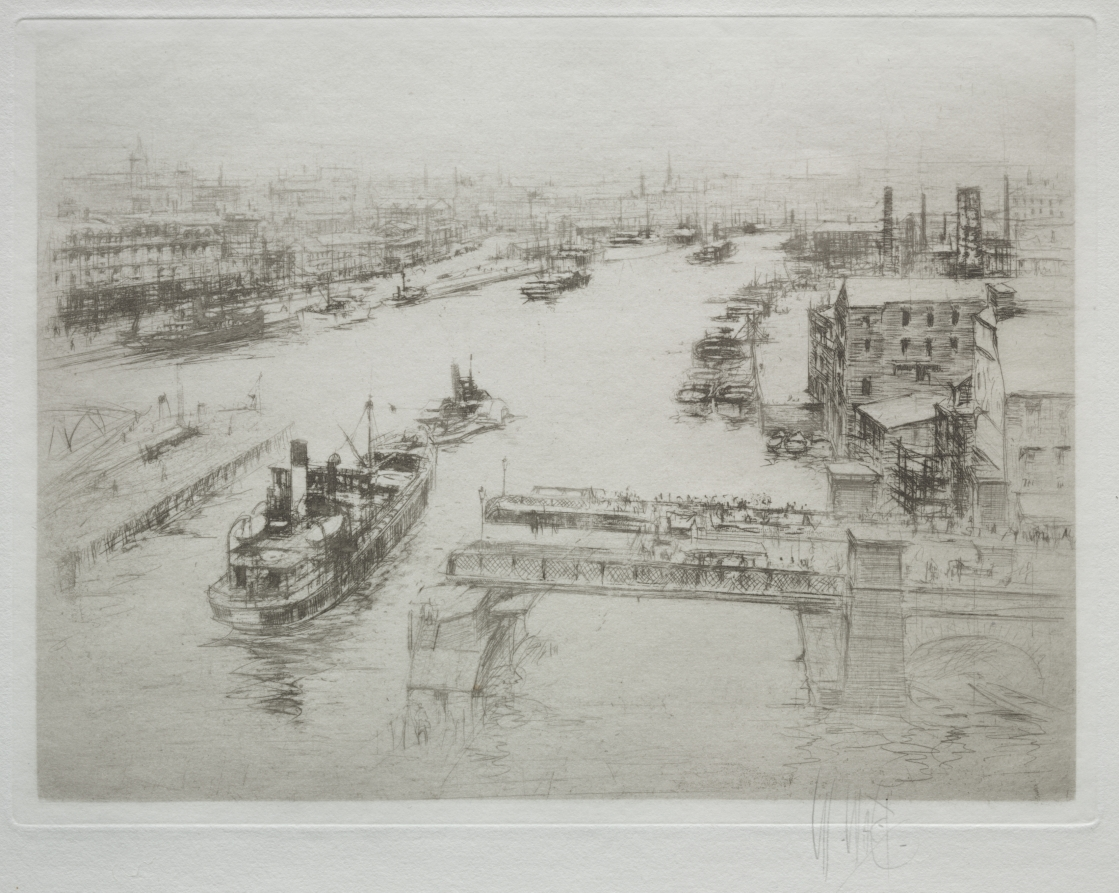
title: Arteries of Great Britain: The Tyne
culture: England, 20th century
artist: William Walcot (British, 1874–1943)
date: 1922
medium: drypoint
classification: Print